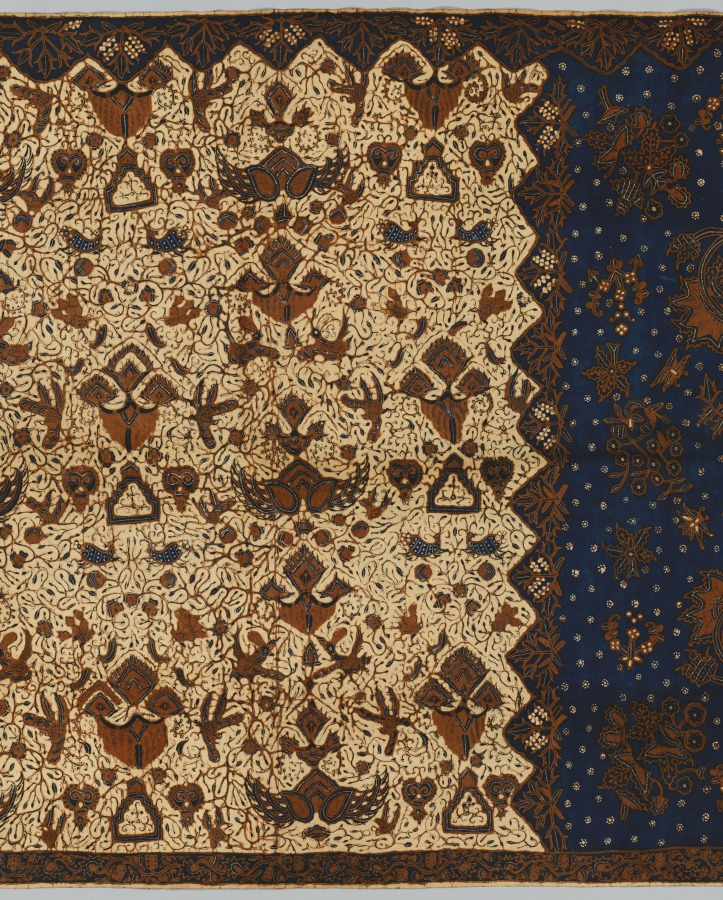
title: Wearing Cloth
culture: Indonesia, Central Java, 19th century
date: 1800s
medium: batik; cotton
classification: Textile